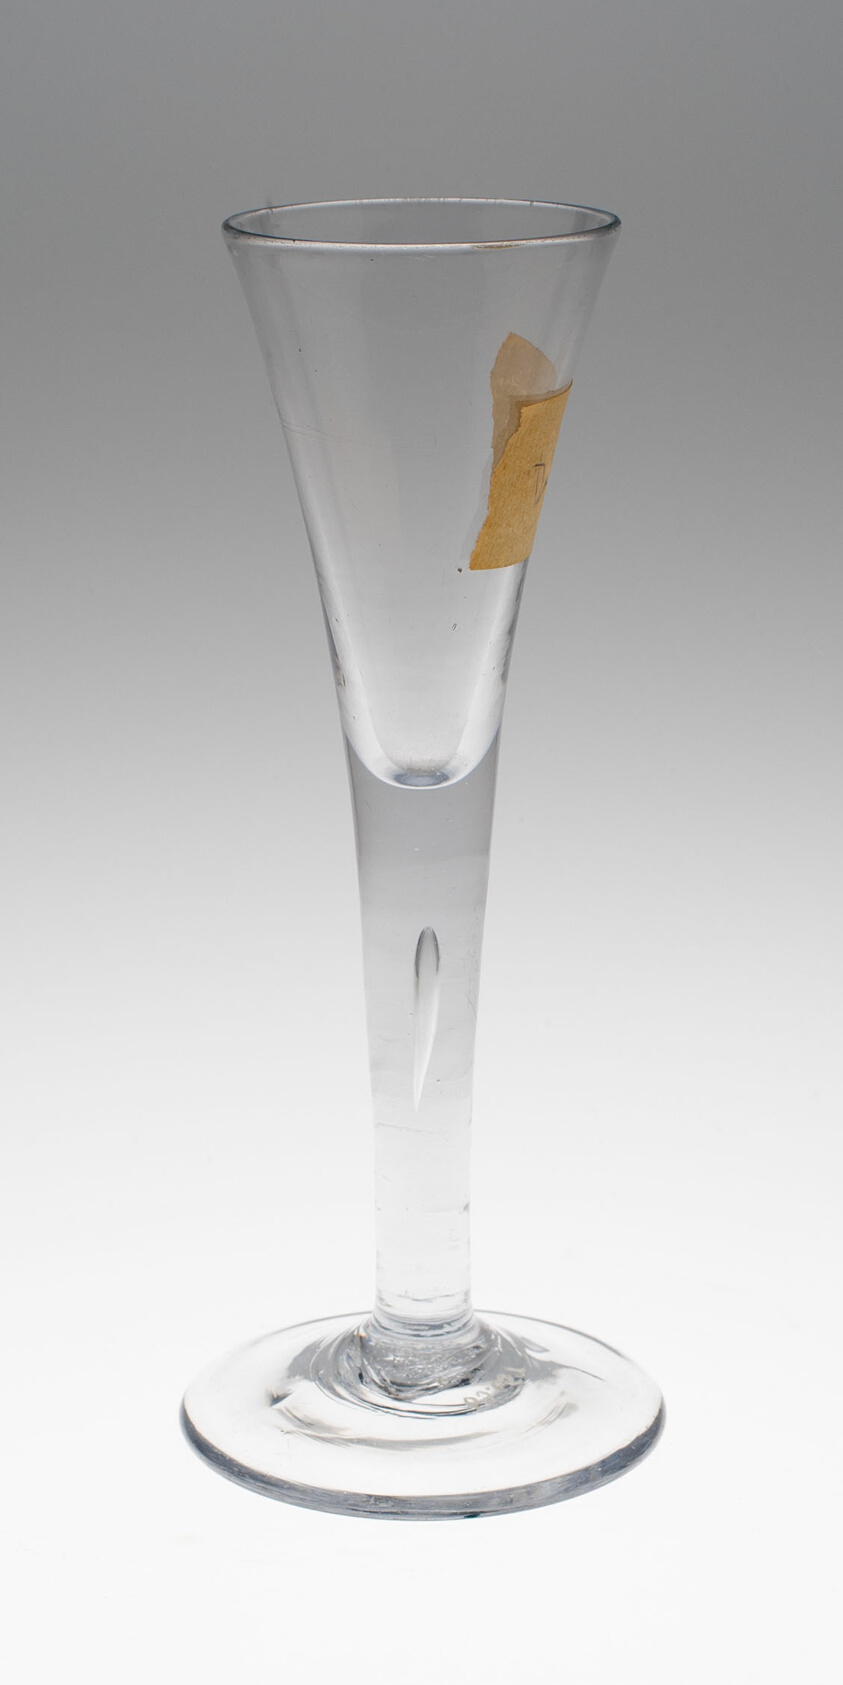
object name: Glass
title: Wine Glass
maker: England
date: c. 1740/80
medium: Glass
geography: England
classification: drinking vessel; glass; european decorative arts